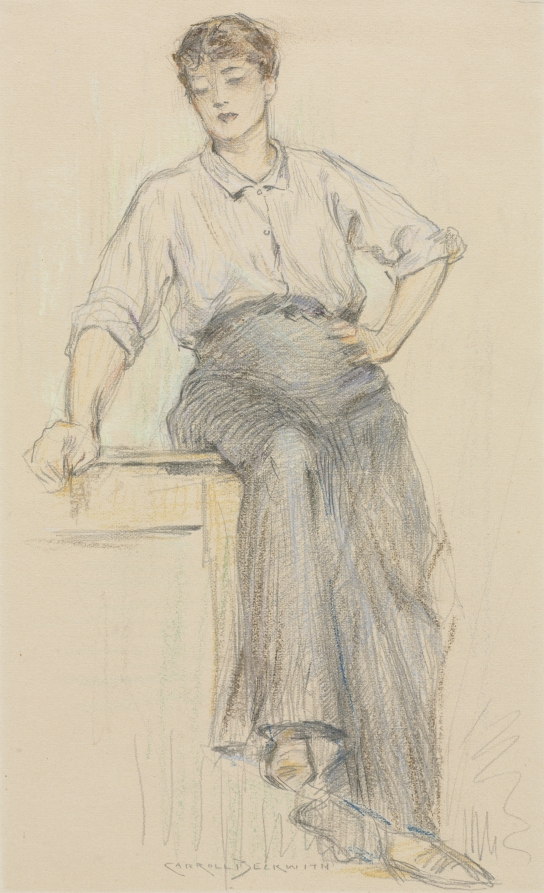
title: The Toiler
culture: America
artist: James Carroll Beckwith (American, 1852–1917)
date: before 1917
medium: pencil and crayon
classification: Drawing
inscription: Signed in pencil: "CARROLL BECKWITH"